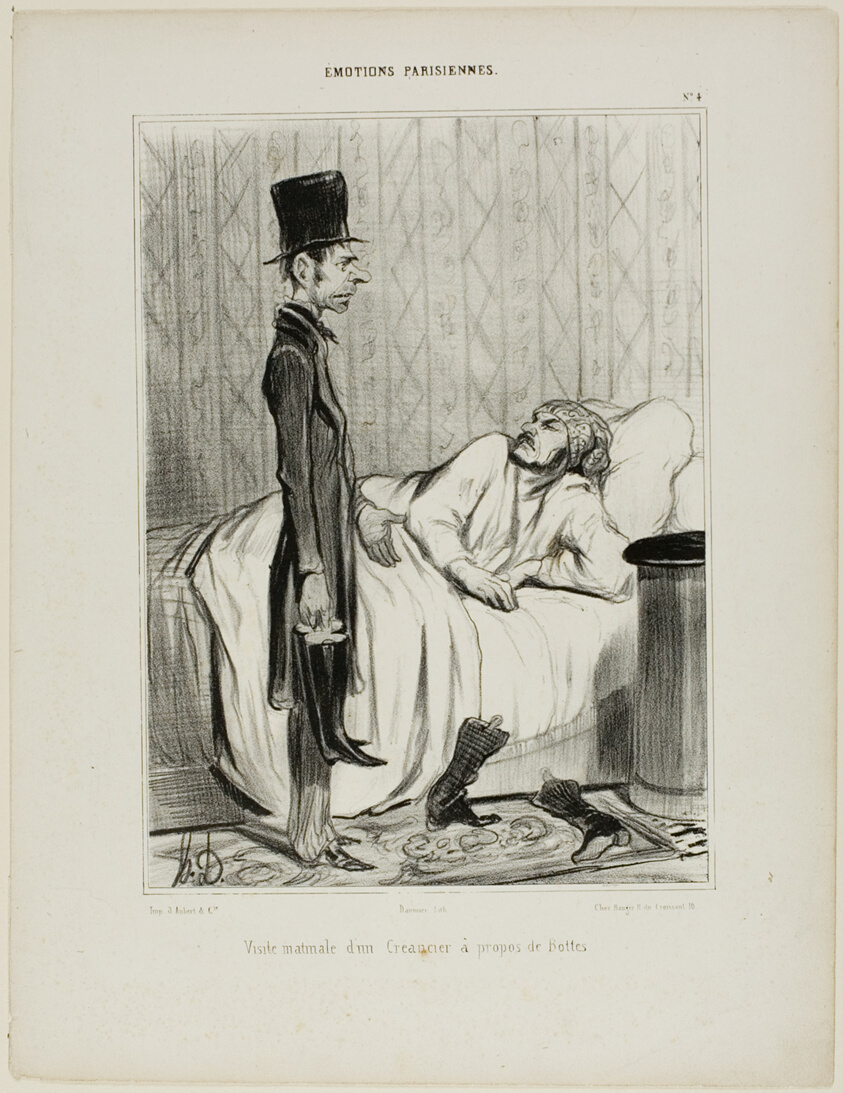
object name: Print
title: Early morning visit of a creditor concerning the boots, plate 4 from Émotions Parisiennes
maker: Honoré Victorin Daumier; French, 1808-1879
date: 1839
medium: Lithograph in black on white wove paper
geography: France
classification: lithograph; print; prints and drawing